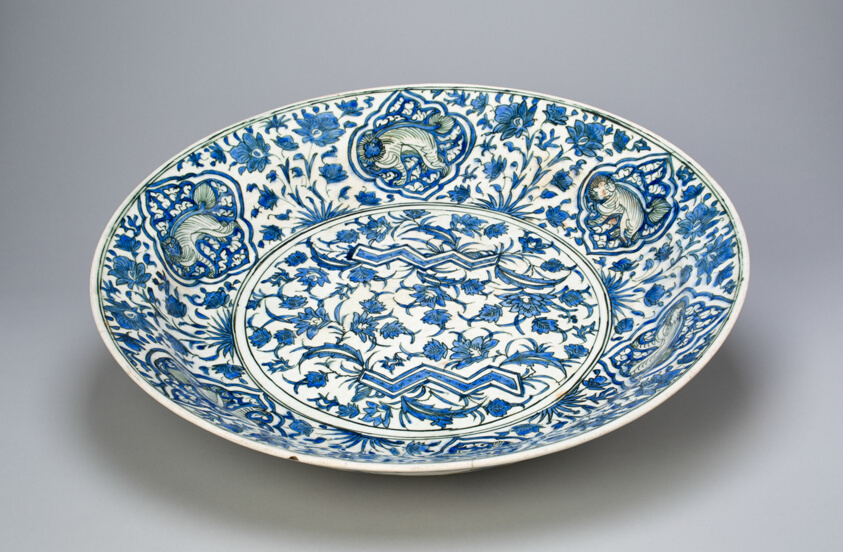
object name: Ceramics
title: Dish with Floral and Animal Decoration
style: Islamic (culture or style)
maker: Iran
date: Safavid dynasty (1501–1722), 17th century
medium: Fritware painted in blue and black over white slip and under transparent glaze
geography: Iran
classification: dish (vessel); asian art; ceramics; vessel